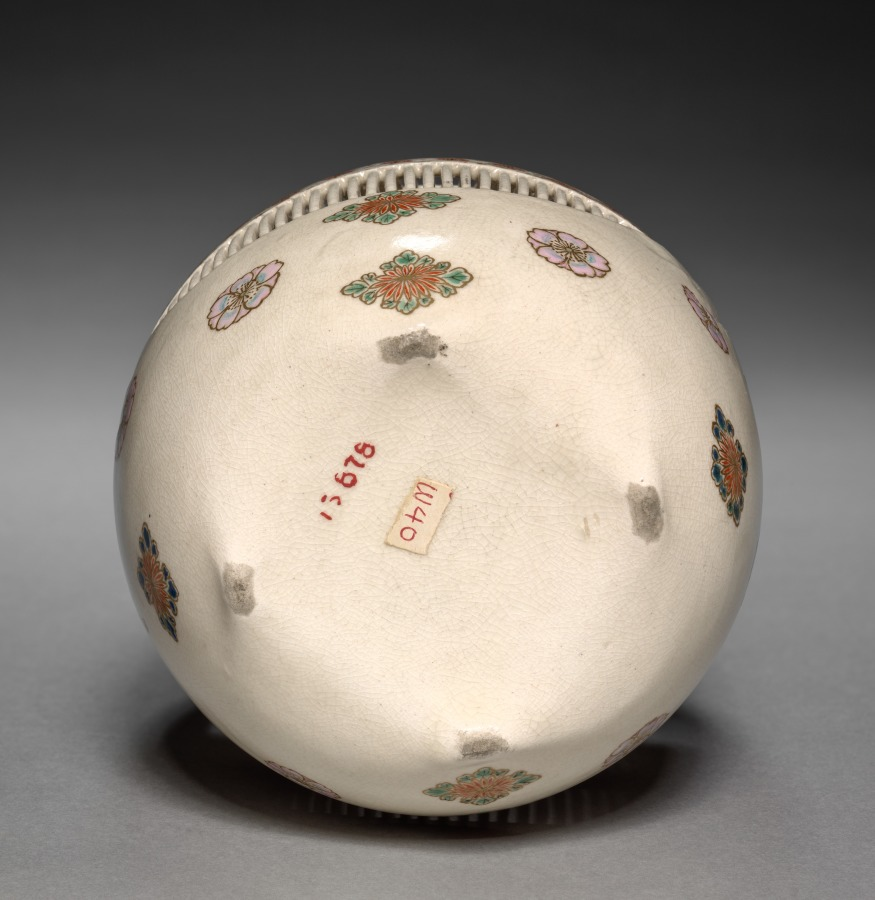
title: Jar: Satsuma Ware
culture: Japan, Edo period (1615–1868)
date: early to mid-1800s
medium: pottery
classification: Ceramic